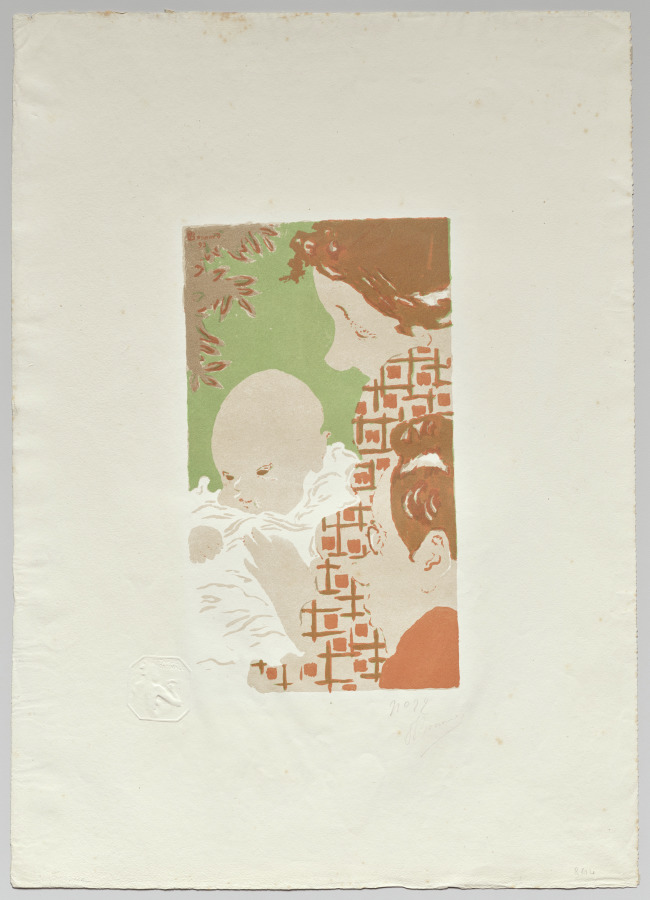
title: Family Scene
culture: France, 19th century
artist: Pierre Bonnard (French, 1867–1947)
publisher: L'Estampe Originale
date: 1893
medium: color lithograph on beige wove paper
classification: Print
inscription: signed and inscribed, lower right, in graphite: no. 22 / P. Bonnard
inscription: at lower left: blind stamp of L’Estampe Originale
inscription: in pencil on recto, lower right: "No. 6 (?)/P. Bonnard (signed)"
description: Pierre Bonnard favored domestic scenes, often focusing on the intimacy of family life. This early lithograph is one of several that he made depicting his sister Andrée and her infant son Jean, born the year before. Bonnard included himself in the image at lower right, gazing at his nephew. The awkward cropping of the figures of the artist and his sister, along with the flat planes of color throughout the image, suggest the influence of Japanese woodblock prints on Bonnard during this period.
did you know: The embossed mark below the lower left corner of this print indicates that it was included in L'Estampe Originale, a monthly luxury publication during the 1890s that featured original prints.